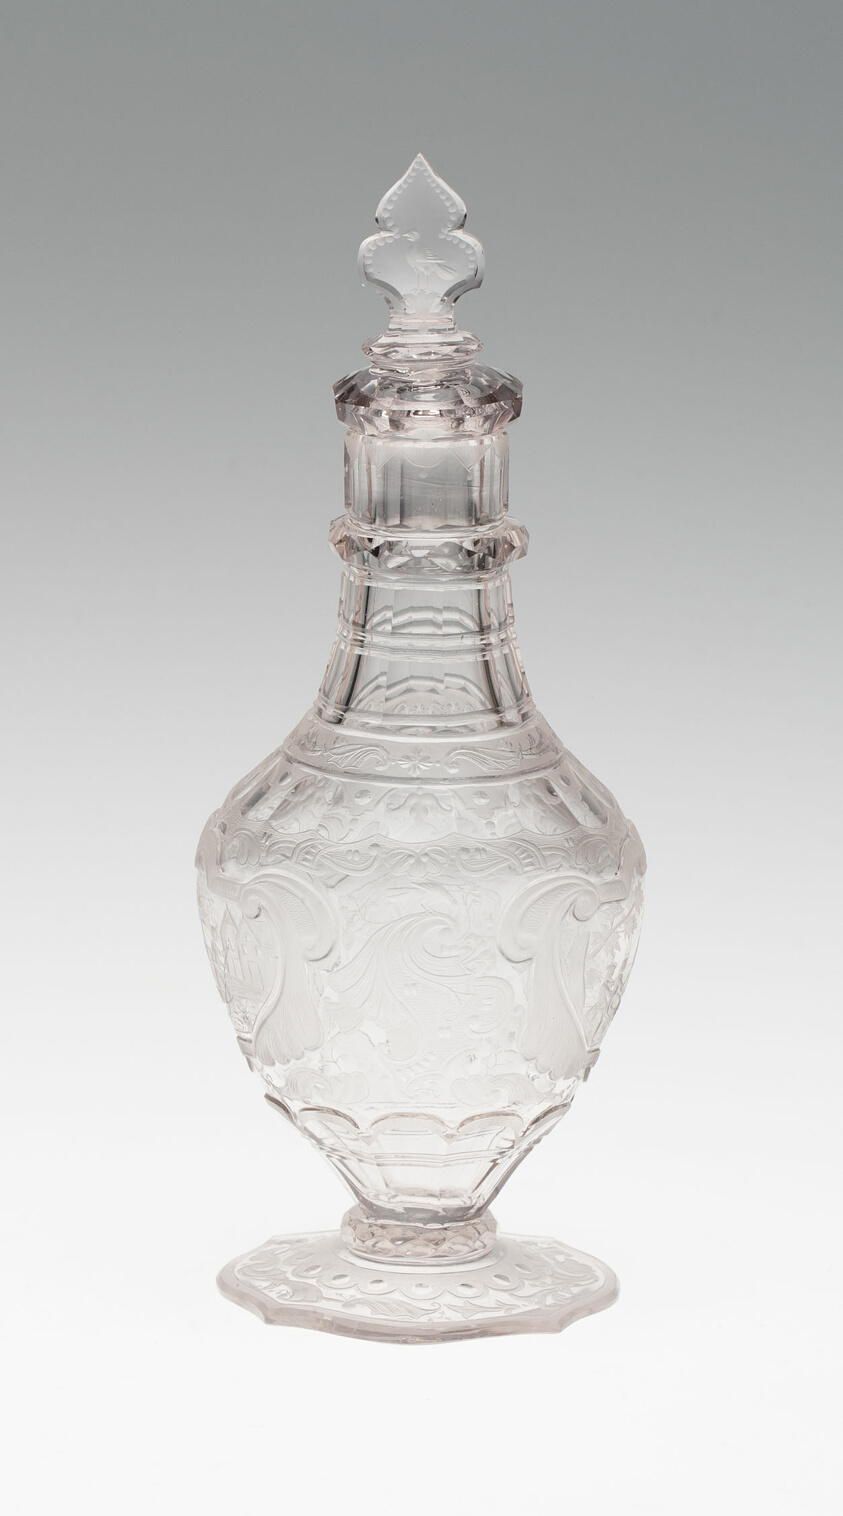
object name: Glass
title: Cruet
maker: Poland (formerly German Silesia)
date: c. 1750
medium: Glass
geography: Silesia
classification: glass; european decorative arts